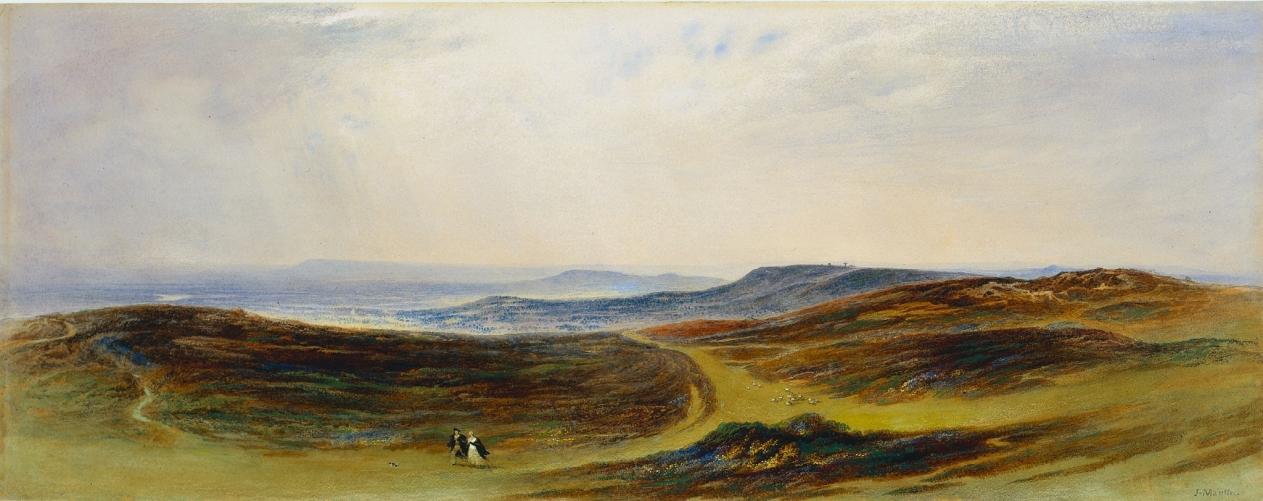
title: The Valley of the Tyne, My Native Country near Henshaw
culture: England, 19th century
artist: John Martin (British, 1789–1854)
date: 1842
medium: watercolor, gouache and gum arabic with graphite underdrawing, sanding, and scraping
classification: Drawing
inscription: signed, lower right, in watercolor: J. Martin / 1842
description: Panoramic landscapes in watercolor became an important source of income during John Martin’s late career. This work demonstrates his ability to convey monumentality on a small scale and to combine broad washes of color with meticulous detail. The sweeping vista in this drawing describes the fertile valley of the River Tyne, known for its forests, flora, and fauna. Curving arcs of slopes and plains swirl around the composition. A tiny couple and dog rush through the vast landscape beneath ominous storm clouds.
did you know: The setting of this watercolor is John Martin's native Northumberland, to which he was deeply attached and described having spent time there "exulting in the sublime grandeur of the surrounding beauties of nature."